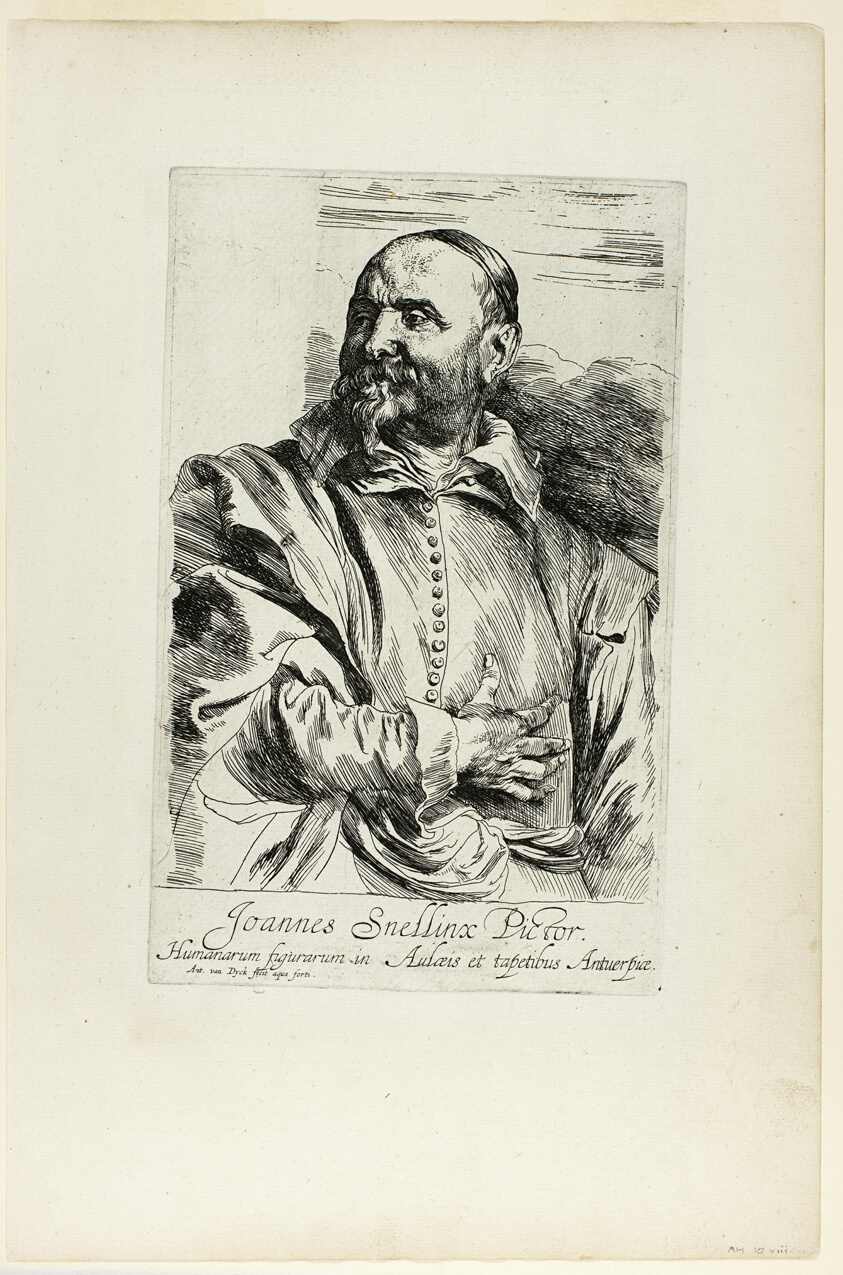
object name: Print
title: Jan Snellinx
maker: Anthony van Dyck (Flemish, 1599-1641)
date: 1630/45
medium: Etching in black on laid paper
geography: Flanders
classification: etching; paper; print; prints and drawing